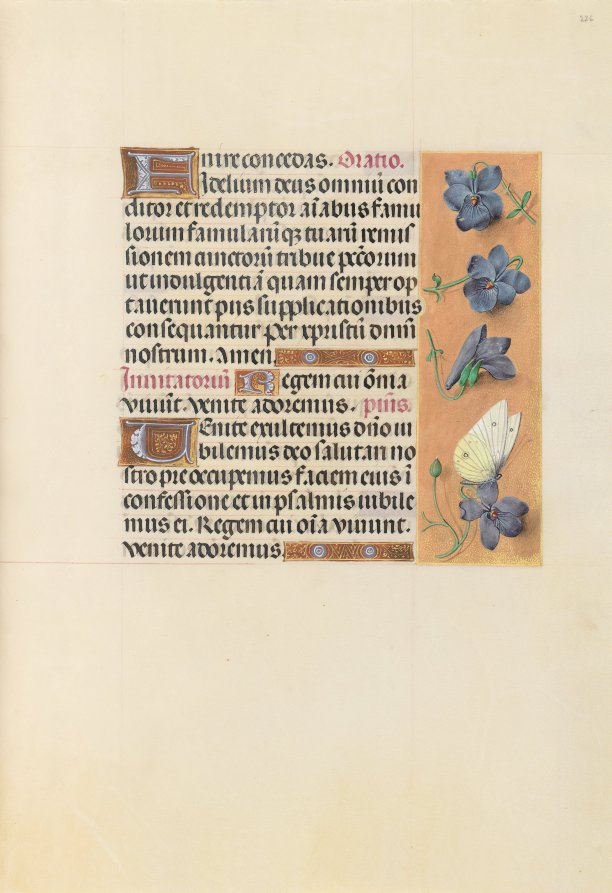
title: Hours of Queen Isabella the Catholic, Queen of Spain: Fol. 226r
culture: Flanders, Ghent and Bruges, late 15th century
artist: Master of the First Prayerbook of Maximillian (Flemish, c. 1444–1519)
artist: and Associates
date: c. 1500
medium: ink, tempera, and gold on vellum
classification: Bound Volume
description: This manuscript was illuminated by a circle of at least five highly organized manuscript painters active in the Flemish cities of Ghent and Bruges. The principal illuminator was Alexander Bening, who painted the majority of the book's miniatures. Manuscripts produced by this circle of artists are renowned for the decoration of their borders, which typically feature a rich variety of realistically-painted flowers, birds, and butterflies. This prayer book, called a book of hours, was intended not for a cleric, but for the private devotions of a lay person-in this case, Isabella the Catholic, Queen of Spain (1451-1504). Isabella's coat of arms embellishes the book's frontispiece. It is unlikely that the book was commissioned by the Queen herself; rather, she probably received it as a diplomatic gift from someone courting her patronage, perhaps Cardinal Francisco Jimenez de Cisneros. A Franciscan friar, Jimenez was dependent upon Isabella for his advancement, first to the post of Queen's confessor in 1492, and then to Archbishop of Toledo in 1495.